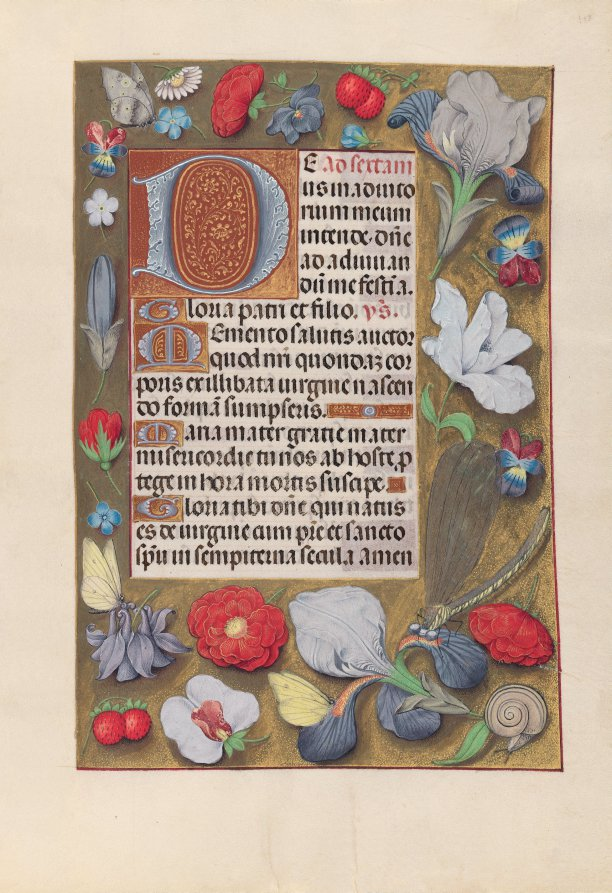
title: Hours of Queen Isabella the Catholic, Queen of Spain: Fol. 137r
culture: Flanders, Ghent and Bruges, late 15th century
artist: Master of the First Prayerbook of Maximillian (Flemish, c. 1444–1519)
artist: and Associates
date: c. 1500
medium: ink, tempera, and gold on vellum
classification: Bound Volume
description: This manuscript was illuminated by a circle of at least five highly organized manuscript painters active in the Flemish cities of Ghent and Bruges. The principal illuminator was Alexander Bening, who painted the majority of the book's miniatures. Manuscripts produced by this circle of artists are renowned for the decoration of their borders, which typically feature a rich variety of realistically-painted flowers, birds, and butterflies. This prayer book, called a book of hours, was intended not for a cleric, but for the private devotions of a lay person-in this case, Isabella the Catholic, Queen of Spain (1451-1504). Isabella's coat of arms embellishes the book's frontispiece. It is unlikely that the book was commissioned by the Queen herself; rather, she probably received it as a diplomatic gift from someone courting her patronage, perhaps Cardinal Francisco Jimenez de Cisneros. A Franciscan friar, Jimenez was dependent upon Isabella for his advancement, first to the post of Queen's confessor in 1492, and then to Archbishop of Toledo in 1495.